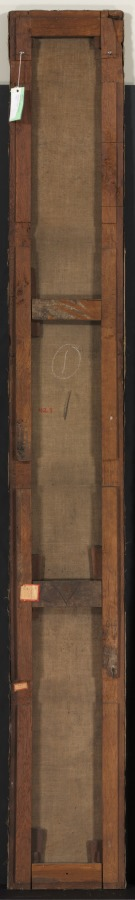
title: Decorative Panel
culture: France, 18th century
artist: Pierre Rousseau (French, 1751–1829)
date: 1790s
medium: oil on canvas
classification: Painting